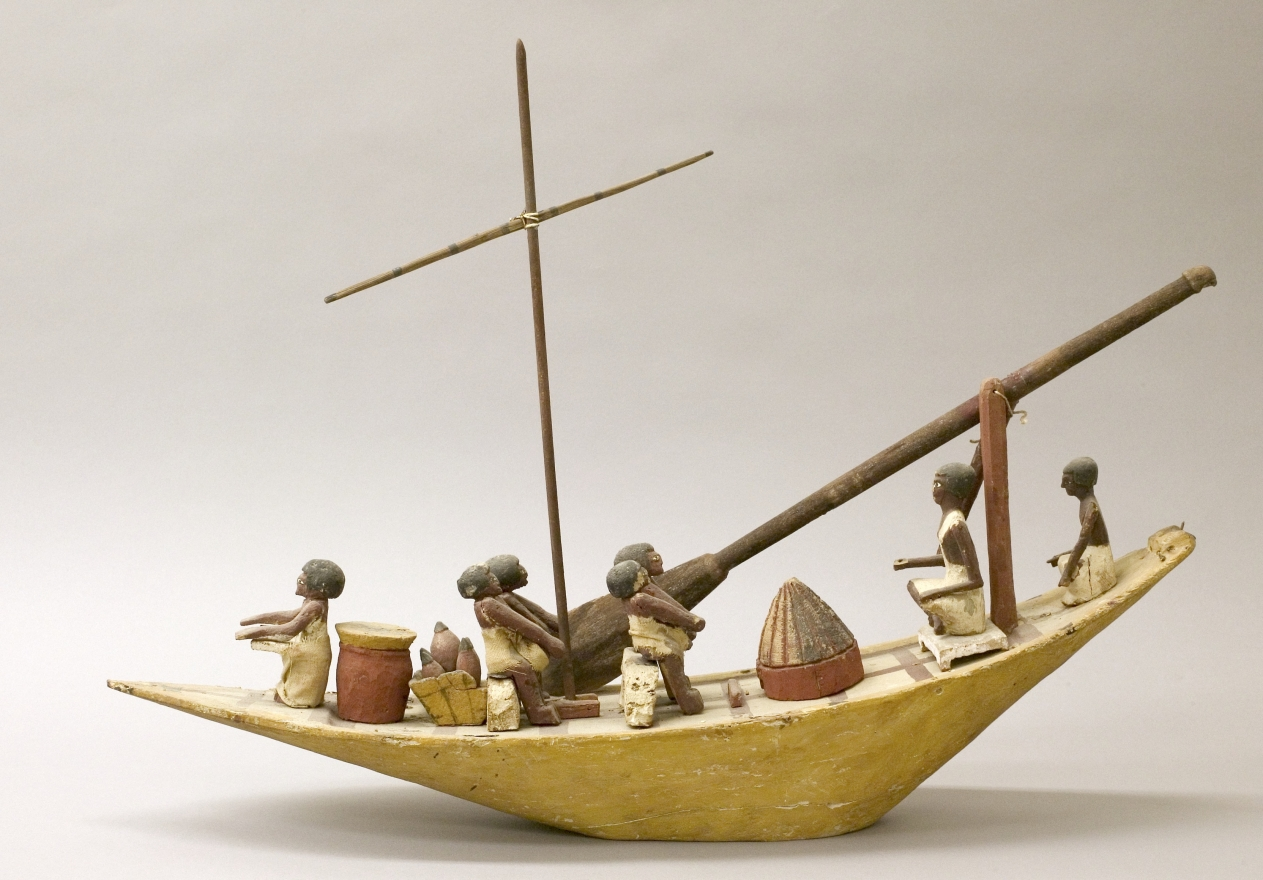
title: Model Boat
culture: Egypt, Middle Kingdom (2040–1648 BCE), Dynasties 11–12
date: 2040–1648 BCE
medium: gessoed and painted sycamore fig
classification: Funerary Equipment